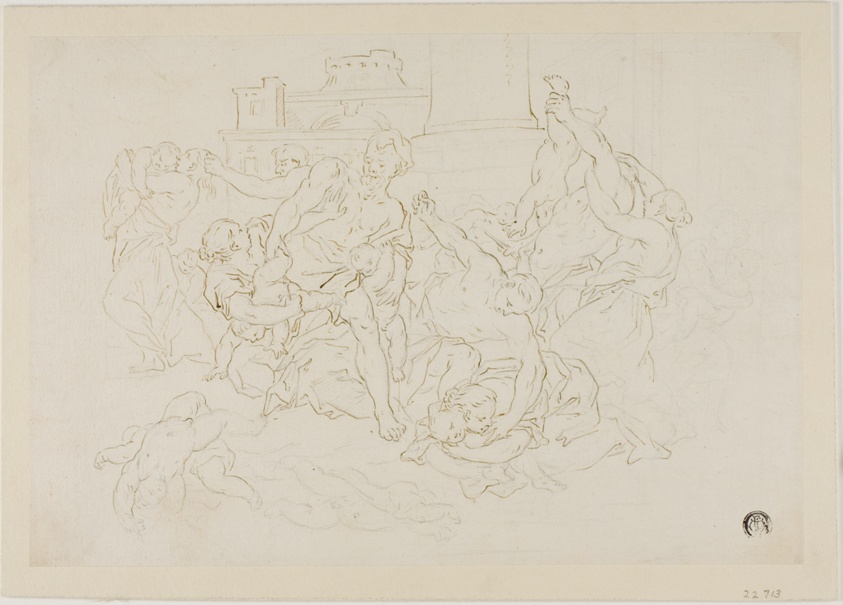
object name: Drawing and Watercolor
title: Massacre of the Innocents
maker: Possibly after Pietro Dandini; Italian, 1646-1712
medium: Pen and brown ink over black chalk on ivory laid paper, laid down on cream wove board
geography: Italy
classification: pen and ink drawings; drawings (visual works); prints and drawing